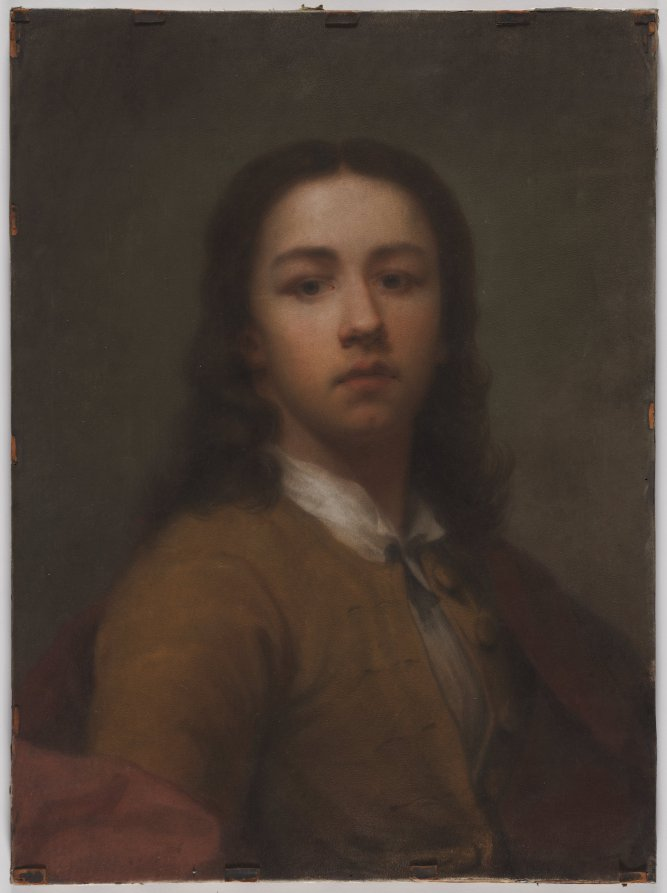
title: Self-Portrait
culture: Germany, 18th century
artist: Anton Raphael Mengs (German, 1728–1779)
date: mid 1700s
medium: pastel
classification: Drawing